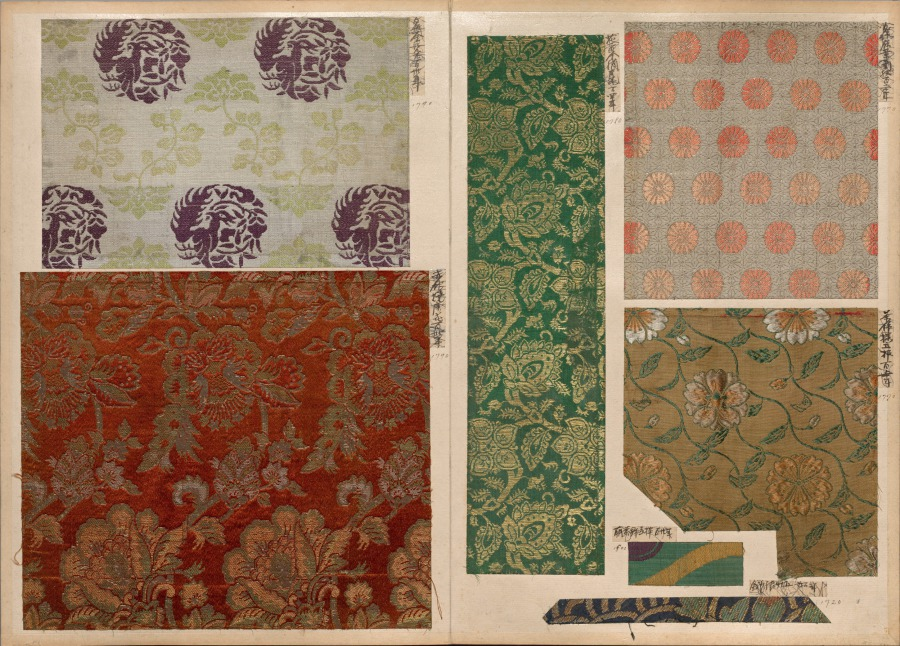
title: Album of Textile Samples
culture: Japan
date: 1790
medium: silk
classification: Textile